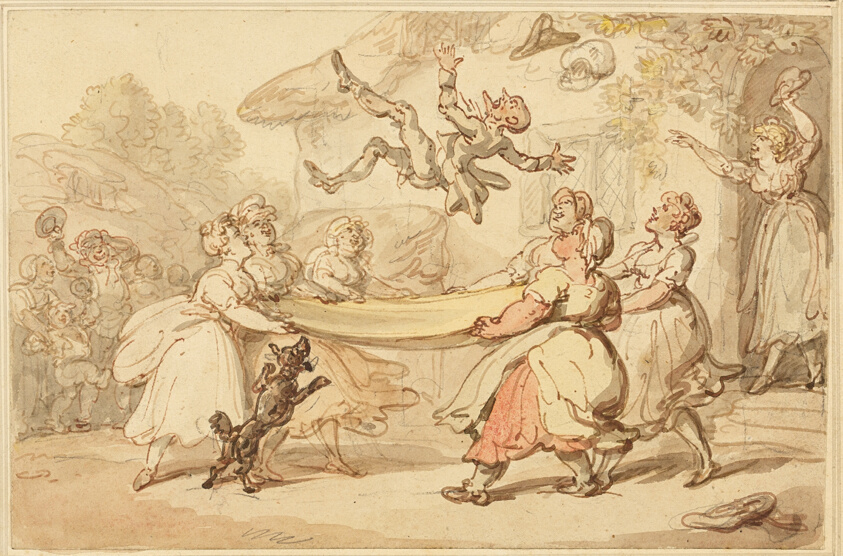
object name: Drawing and Watercolor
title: The Doctor's Punishment Put in Execution to the Small Entertainment of the Whole Village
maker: Thomas Rowlandson (English, 1756-1827)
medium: Pen and brown and gray ink with brush, and watercolor with graphite, on tan wove paper, laid down on card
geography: England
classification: watercolor; drawings (visual works); prints and drawing